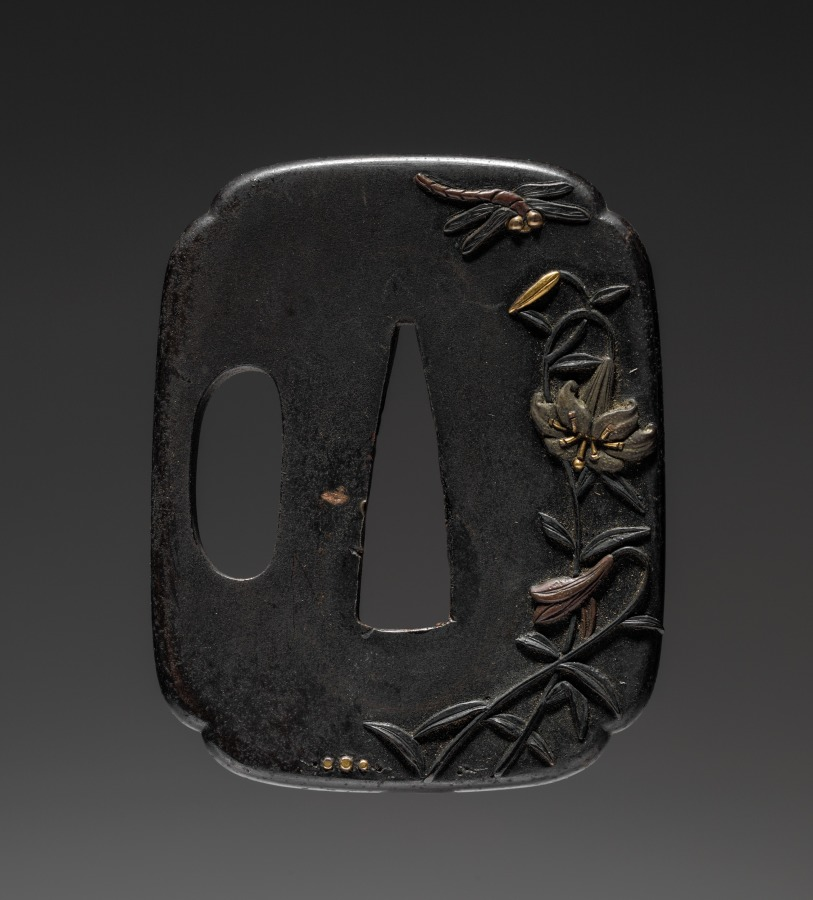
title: Sword Guard (Tsuba) with Dragonfly and Lily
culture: Japan, possibly Edo period (1615–1868)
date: c. 1615–1868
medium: metal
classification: Arms and Armor